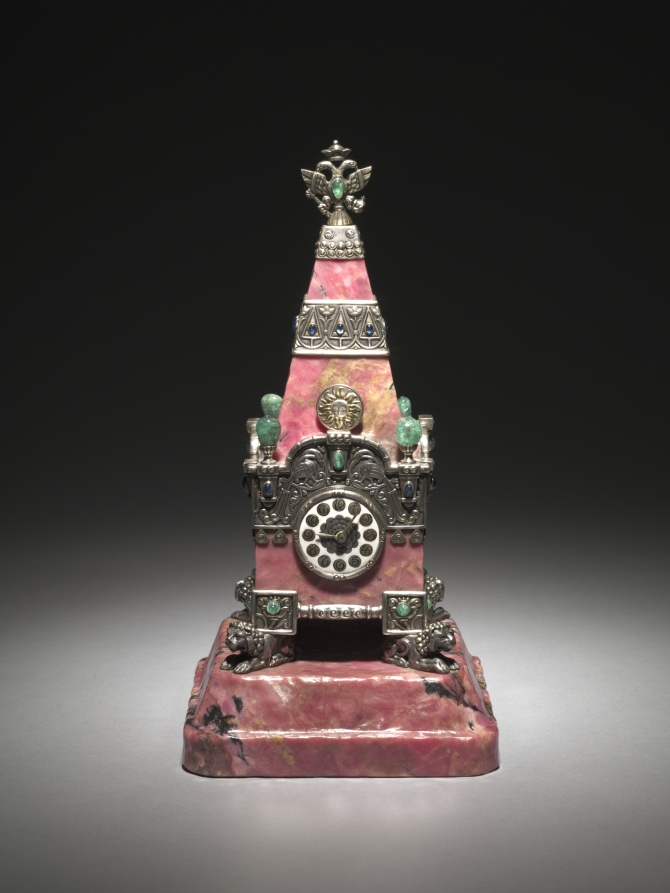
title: Kremlin Tower Clock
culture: Russia, St. Petersburg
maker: House of Fabergé (Russian, 1842–1918)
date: c. 1913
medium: rhodonite, silver, enamel, emeralds, sapphires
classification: Timepiece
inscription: 84, Kokoshnik, delta [assay mark for Moscow, 1908-26]; 91, Kokoshnik; 91; Kokoshnik; C. Fabergé (in Cyrillic); double-headed eagle [imperial warrant]; 16419 k? scratched.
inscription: Painted on clock face: Le Gruet (in script); strike, silence, set hand work (in English).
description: The use of Russian hardstones in creating precious objects became a hallmark of design from the House of Fabergé. Easily carved, these minerals were sourced largely from the western region surrounding the Ural Mountains. Fabergé's workmasters used colorful stones such as agate, nephrite (jade), lapis lazuli, rock crystal, and rhodonite, seen here in this elaborate table or mantel clock, to create all manner of luxurious accessories. Bright pink rhodonite was among the rarest, and consequently most expensive, specimens used by the House of Fabergé. This clock resembles the Taynitskaya Tower, the middle tower on the south side of the Kremlin. The House of Fabergé created this work to commemorate the 300th anniversary of the Romanov dynasty, representing Fabergé's ability to balance the functionality of objects with intricate decorative design.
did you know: The Kremlin tower, which this clock resembles, has a secret well and an underground tunnel that leads to the Moscow River.